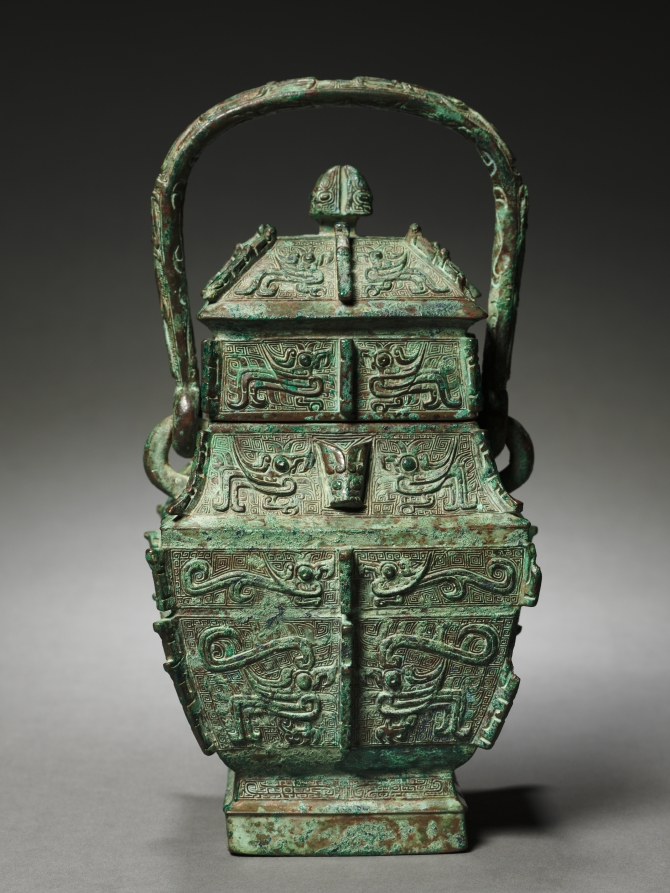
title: Square Wine Container (Fangyou)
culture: China, Henan province, probably Anyang, Shang dynasty (c. 1600–c. 1046 BCE), Anyang phase (c. 1250–1046 BCE)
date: c. 1250–1046 BCE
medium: bronze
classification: Metalwork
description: From the finely proportioned body to the elaborate decoration cast with great precision, this ritual wine vessel displays the artistic refinement and technical virtuosity that marked the full blossoming of late Shang bronze art. The dramatic contrast of the crested birds (kuifeng) against the dense background of spiral patterns (leiwen) gives the vessel a new force, clarity, and intense vitality. The distinctive square body also places it as a rare and important type among the more usual round or ovoid types.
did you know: The bird motif decoration of this bronze is uncommon; more often these bronzes are decorated with a combination of birds and dragons.